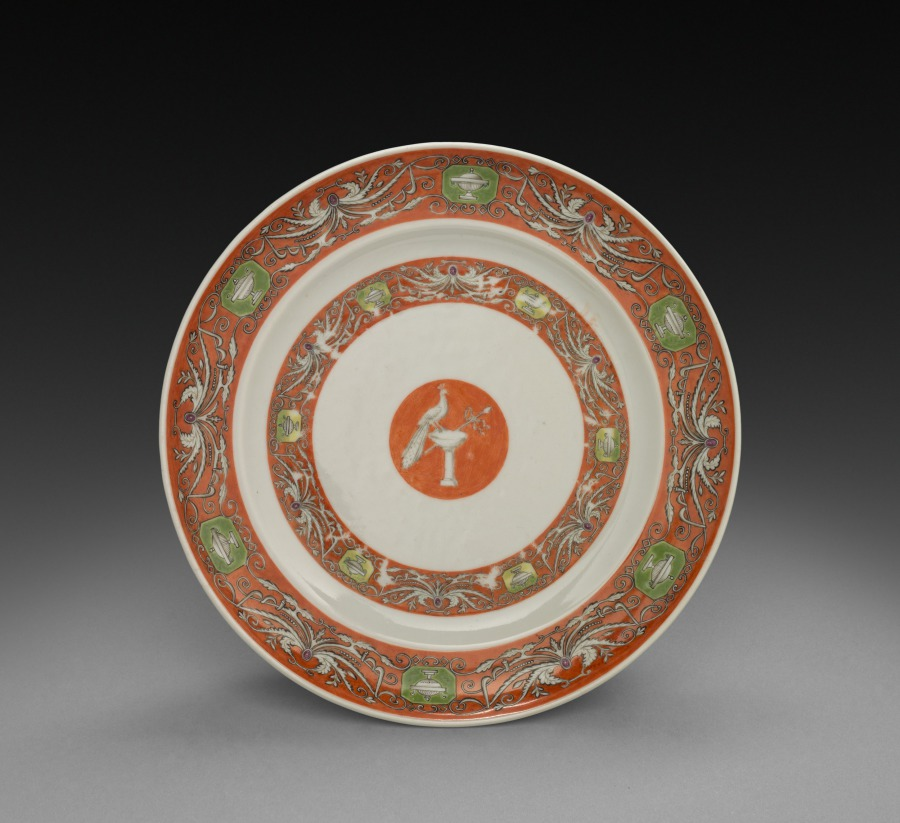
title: Plate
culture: China, Chinese Export, 18th century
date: 1785–1800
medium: porcelain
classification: Ceramic